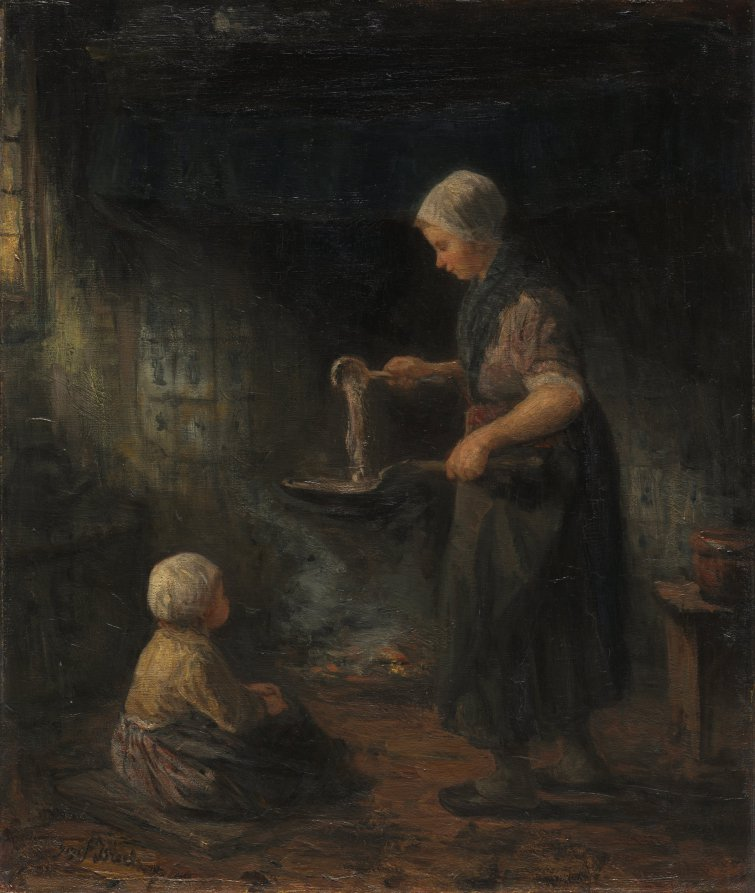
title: The Pancakes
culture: Netherlands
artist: Jozef Israëls (Dutch, 1824–1911)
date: c. 1875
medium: oil on fabric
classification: Painting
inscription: Signed lower left: Jozef Israels